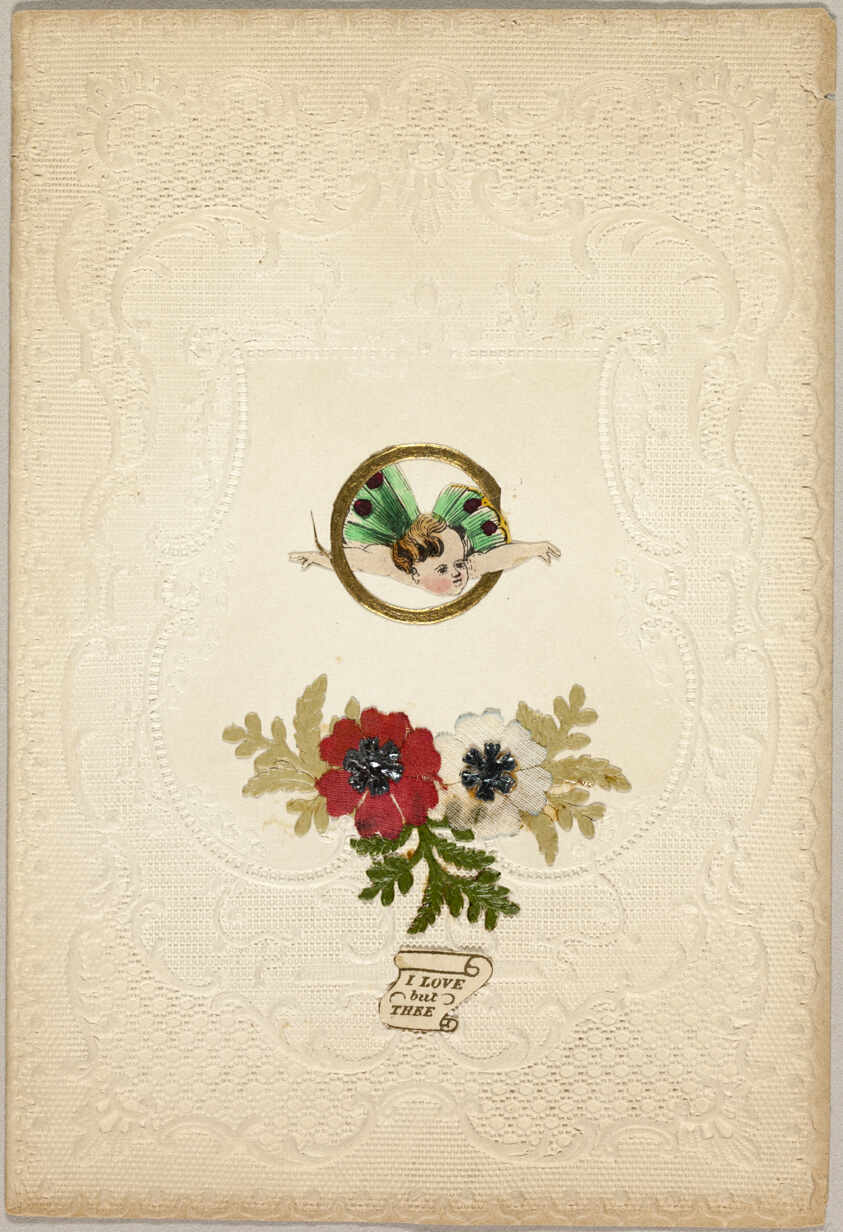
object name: Drawing and Watercolor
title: I Love but Thee (Valentine)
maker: Unknown Artist; American or English, 19th century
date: c. 1840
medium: Collaged elements on embossed ivory wove paper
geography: United States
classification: collage; valentine; prints and drawing; paper